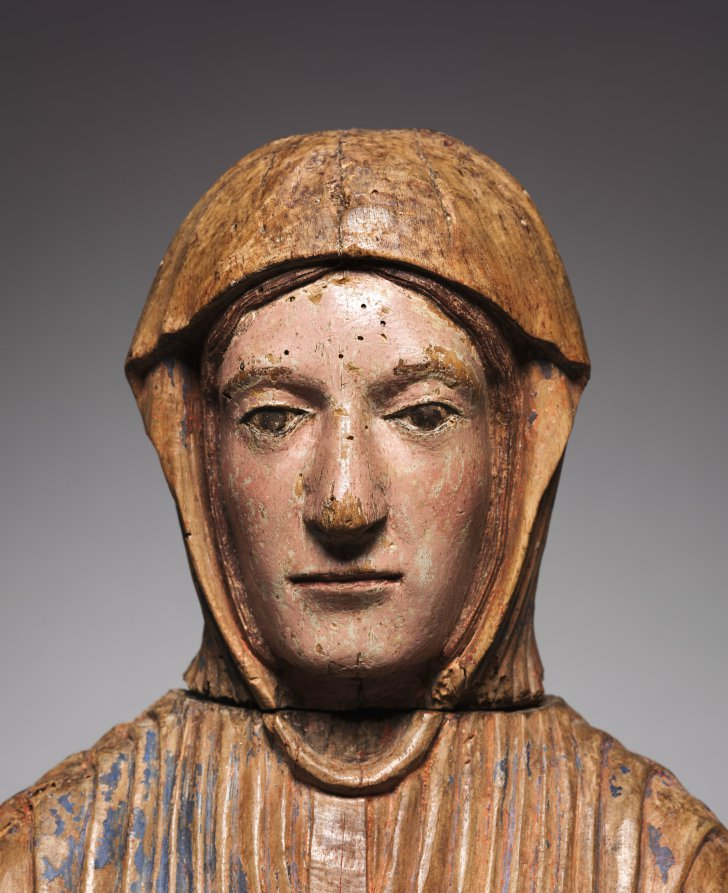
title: Virgin and Child in Majesty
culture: France, Auvergne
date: c. 1150–1200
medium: polychrome wood (walnut)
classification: Sculpture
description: This sculpture belongs to a group of early representations of the Virgin and Child known as the Sedes Sapientiae (the Throne of Wisdom). The subject embodies a complex and core Christian doctrine of the Virgin’s role in the Incarnation (the moment in which Christ became flesh) and ultimately in the redemption of humankind. Mary faces forward, her gaze toward the beholder. As she is seated on a throne, she in turn becomes the throne to the Christ child, thus symbolizing her role in giving birth not only to the human Jesus, but also to the divine Christ. The Incarnation gave Mary a unique role as principal mediator between heaven and earth, and between God and humankind. As a result, her image proliferated in art, especially after the 12th century, a period in which there was surging interest in Mary’s life and increasing devotion to her person and images. The sculpture belongs to a rare group of surviving figures produced in the Auvergne region of central France during the second half of the 12th century. These "Auvergne" Virgins are estimated to number only about 25 or 30 and are characterized by their linear, calligraphic draperies, which form beautiful swirls and contours. All such sculptures are smaller than life-size and made of wood in order to make them mobile. Evidence suggests that they were moved from altar to altar or church to church, and were frequently carried in procession within churches and town streets on Marian feast days. The heads were intentionally removable in order to "dress" them in costumes for such processions.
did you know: In this sculpture of Mary and Jesus, their heads are detachable.